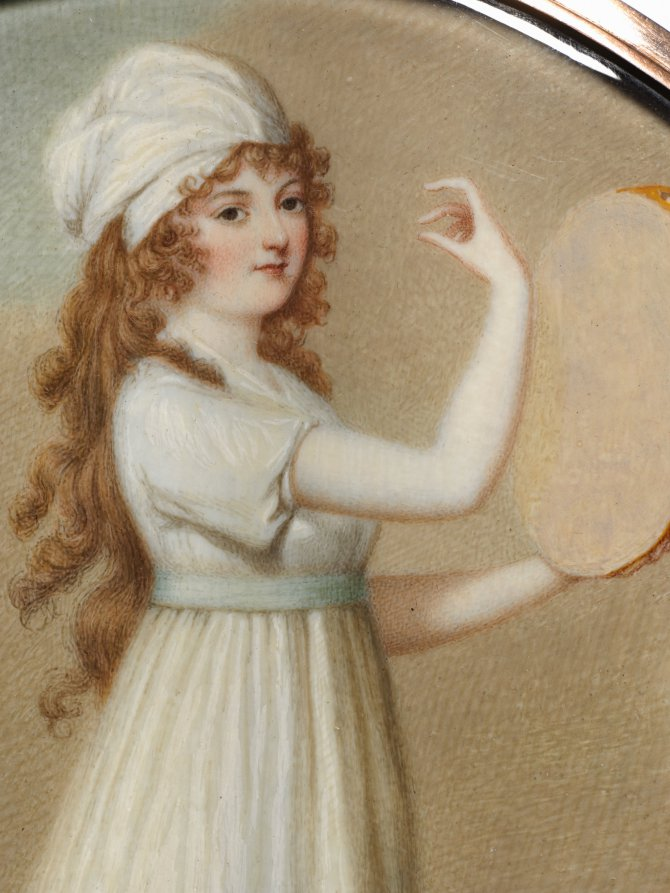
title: Woman with a Tambourine, in Neoclassical Costume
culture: England, 19th century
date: mid to late 19th century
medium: watercolor on ivory in a gold frame with blue glazed reverse and reserve with plaited hair and initials in gold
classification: Portrait Miniature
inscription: annotated lower right: R.C. [initialed on back: JCSB]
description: This large miniature depicts a woman at full length, turned to the left, playing a tambourine held in her left hand. She wears a floor-length, white, Empire-waist gown with short sleeves and scarlet slippers. The Empire silhouette was fashionable in the years around 1800, when it was executed in fine, white cotton or muslin and meant to recall classical Greek or Roman dress. The woman’s light brown hair falls below her waist in curls, and she wears a white turban. She stands on a pale green, closely cropped lawn in front of a low, green, wrought-iron fence with a wood railing. At over 15 centimeters high in its frame, this miniature’s size is incongruous with its oval shape and elaborate glass and braided hair setting, which were typical of late-eighteenth- and early-nineteenth century wearable miniatures a third or quarter of this size. The woman’s face lacks specificity and is probably not a portrait of a particular individual but, rather, a fancy picture exploring themes of beauty and music. This assertion does, however, call into question the presence of the initials and hair on the back of the setting, which customarily indicate an intimate relationship between the owner and the sitter that presumably would be absent outside of portraiture. When this work entered the collection in 1926, it was believed to date from the late eighteenth century, but its size, shape, and the full-length figure make such an early date extremely unlikely. The signature “R. C.” may suggest Richard Cosway (1742–1821), the highly sought-after eighteenth- and nineteenth-century miniaturist; however, this work does not resemble his style. J. H. Wade purchased this object in 1896 for $150—a substantial sum during that period for a miniature—indicating that he may have thought the work was indeed by Cosway. This miniature does relate closely in style and subject matter to the work of the British artist Adam Buck (1759–1833), who was known for his classicizing, full-length watercolor portraits and fancy pictures, after which this work may be a copy. Buck’s miniatures on ivory are bust length and more strongly delineated than this work, which instead recalls the artist’s watercolors. Hallmarks of Buck’s drawings include a low horizon line, muted palette, full-length female figures depicted in profile, and a patchy blue, cloudy sky. A scrolled, wrought-iron fence similar to the one present in this miniature appears in a drawing by Buck. In both cases the fence is used decoratively to break up the expanse of bare space created by the low horizon line and vacant sky. Buck’s works often feature women listening to or playing an instrument, including the tambourine, but he is not known to have painted these full-length figures on ivory. The numerous incompatibilities—including style, subject, composition, medium, setting, size, and signature—together suggest that this object was painted in the second half of the nineteenth century specifically for the art market and to evoke an earlier period.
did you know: On the back the initials JCSB in gold are placed over plaited hair of at least two different colors.